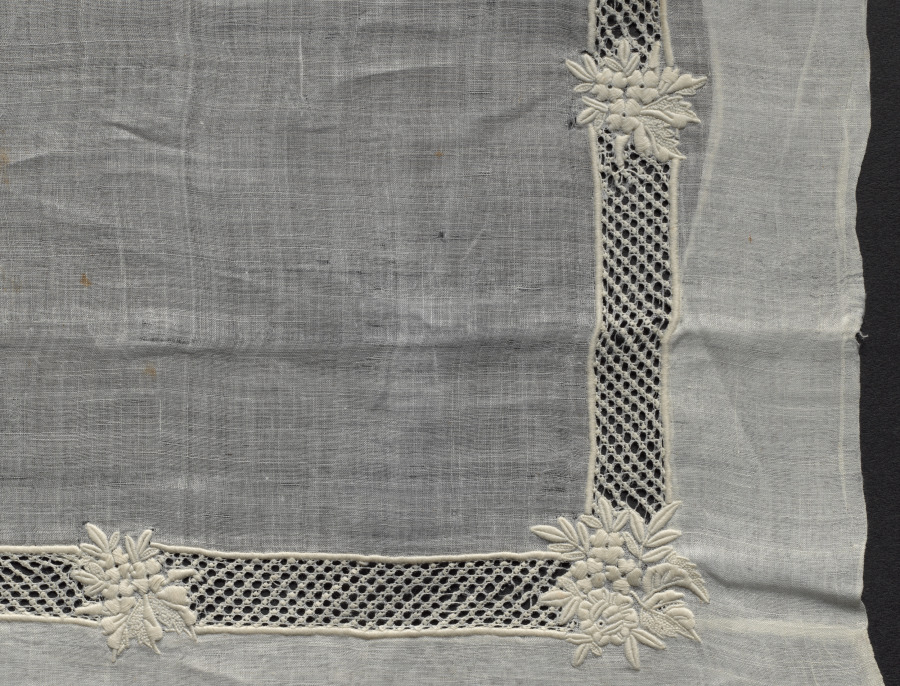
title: Lace Handkerchief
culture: France or Switzerland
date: 1800s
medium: Plain weave linen: needle lace (drawnwork) and embroidery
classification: Embroidery